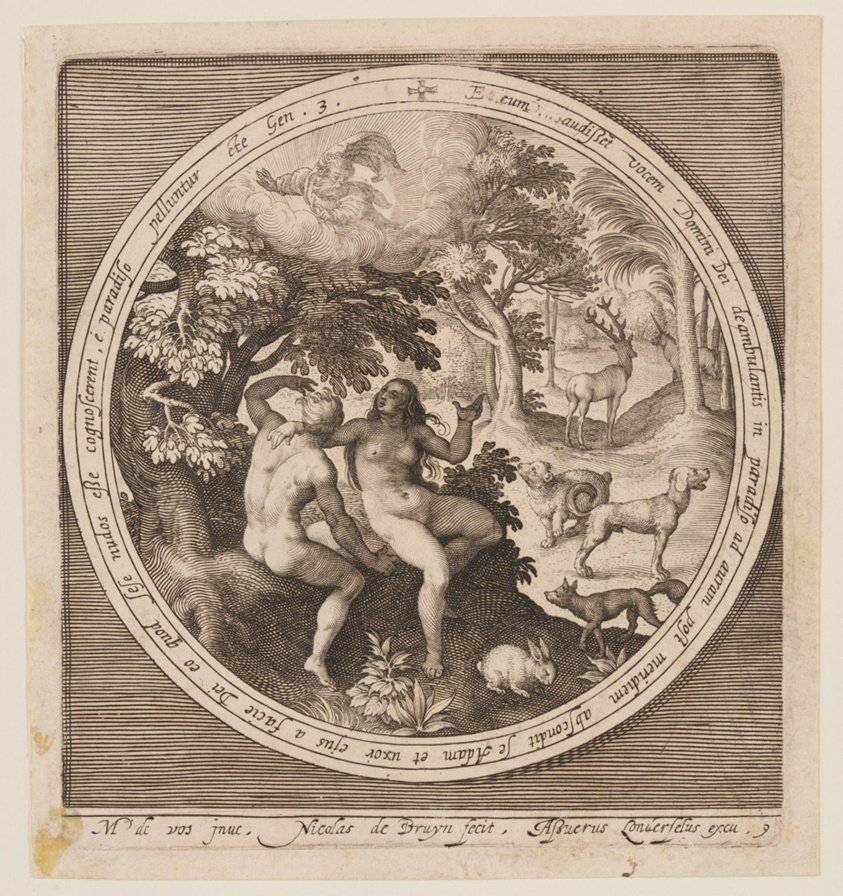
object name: Print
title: Adam and Eve hiding from the Lord, from The Creation to the Expulsion from Paradise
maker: Nicolaes de Bruyn (Flemish, 1571–1656); after Maarten de Vos (Flemish, 1532–1603)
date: c. 1610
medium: Engraving on ivory laid paper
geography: Flanders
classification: engraving; paper; print; prints and drawing